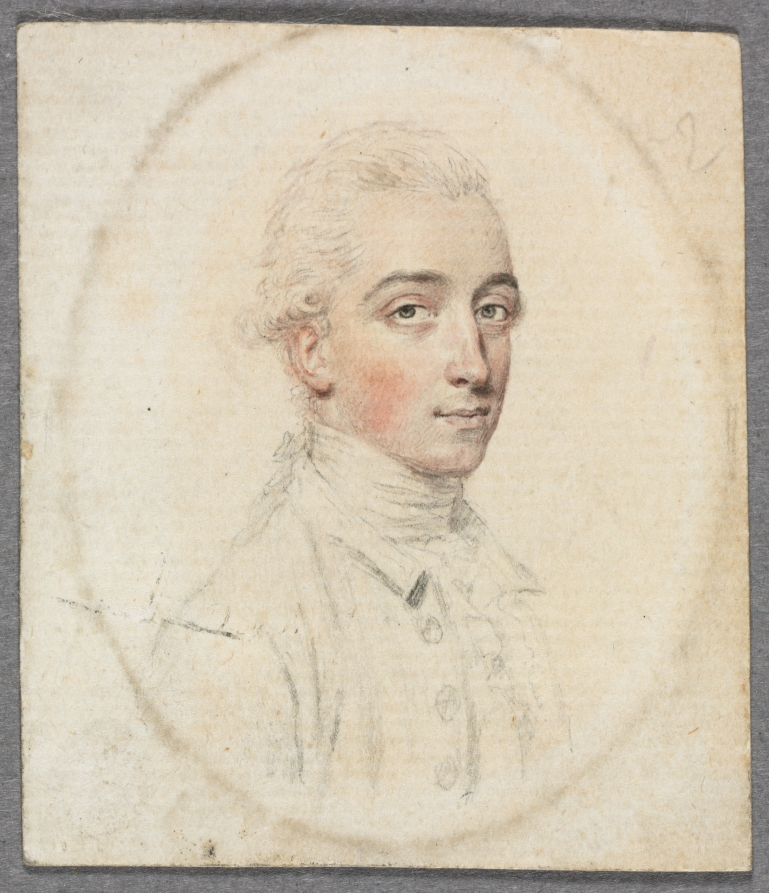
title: Portrait of Mr. Gambier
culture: England, 18th century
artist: John I Smart (British, 1741–1811)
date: c. 1776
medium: graphite and wash on laid paper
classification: Portrait Miniature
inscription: Signature: none; inscribed in graphite on front of paper at upper right corner: [?][?]2; inscribed on paper backing: in graphite, upside down at upper left: 15; in graphite, on a slant at left center to upper right: Mr. Fitzherbert; inscribed on back of paper in graphite: Mr. [Gambier]; inscribed in brown ink: Gambier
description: Although it is impossible to say if it was always part of the artist’s process to execute a preparatory sketch prior to painting each miniature, we do know that John Smart retained many hundreds of these sketches. A group of preparatory sketches—of which this portrait is one—descended through the Smirke family after Smart’s daughter Sarah gave a sketchbook containing preparatory portrait studies to her friend Mary Smirke, sister of the celebrated Victorian architect Sydney Smirke. This book was probably broken up around 1877 when it was divided between Sydney’s daughters Mary Jemmett and Mrs. Lange, whose portions were both sold at auction in 1928. G. C. Williamson was the first to suggest that Smart’s sketches were well known and that they were preparatory studies for the painted miniatures. Williamson listed the names of sitters from the sketches known to him at the time, and they include Mr. Fitzherbert, the identification formerly given to the sitter in this portrait. Here, the sitter’s head and shoulders are facing left. He has brown eyes and wears his powdered hair en queue. His coat has a narrow collar, under which he wears a high stock collar and frilled vest. The color of his attire is not suggested, and the background remains unpainted. Though long catalogued as Mr. Fitzherbert, the portrait was likely mistakenly designated as such at a later date. There has been confusion regarding several miniatures called Mr. Fitzherbert, which may or may not be related. There was a sketch of a different Mr. Fitzherbert in the Jemmett sale of February 29, 1928; another in the Burton-Jones collection by the 1940s; and a miniature of a Mr. Fitzherbert portrayed nearly full face and dated 1771 was sold at Sotheby’s, London, on August 1, 1934 (lot 73). The present location of these unpublished miniatures is unknown, as is their credibility as portraits of the Mr. Fitzherbert that Smart is known to have painted. When the paper backing of the Cleveland miniature was removed in 1993, the name Gambier was discovered inscribed in graphite and pen on the back. This miniature relates to a portrait of a man on ivory dated 1774, formerly in the Ashcroft collection and at one time on loan to the Victoria and Albert Museum. It was sold at Sotheby’s, London, on May 7,1946 (lot 61) and catalogued as a “miniature of a young man, by John Smart, signed and dated, head and shoulders three-quarters sinister, gaze directed at spectator, fair hair en queue, in white cravat, frilled vest and rich red coat, 1 3/8 in.” The size of the portraits correspond, though the ivory miniature represents less of the figure than is seen in the sketch and is therefore smaller. While the color red for the coat is not indicated in the sketch, Smart often left the dress of his male sitters plain in preparatory sketches. Thus, this currently unlocated miniature on ivory can be identified as Mr. Gambier. Research into the identity of this gentleman is ongoing.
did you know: Sketches helped John Smart work out the particulars of a portrait before commencing the miniature on ivory; they were useful in the event that a duplicate might later be required.